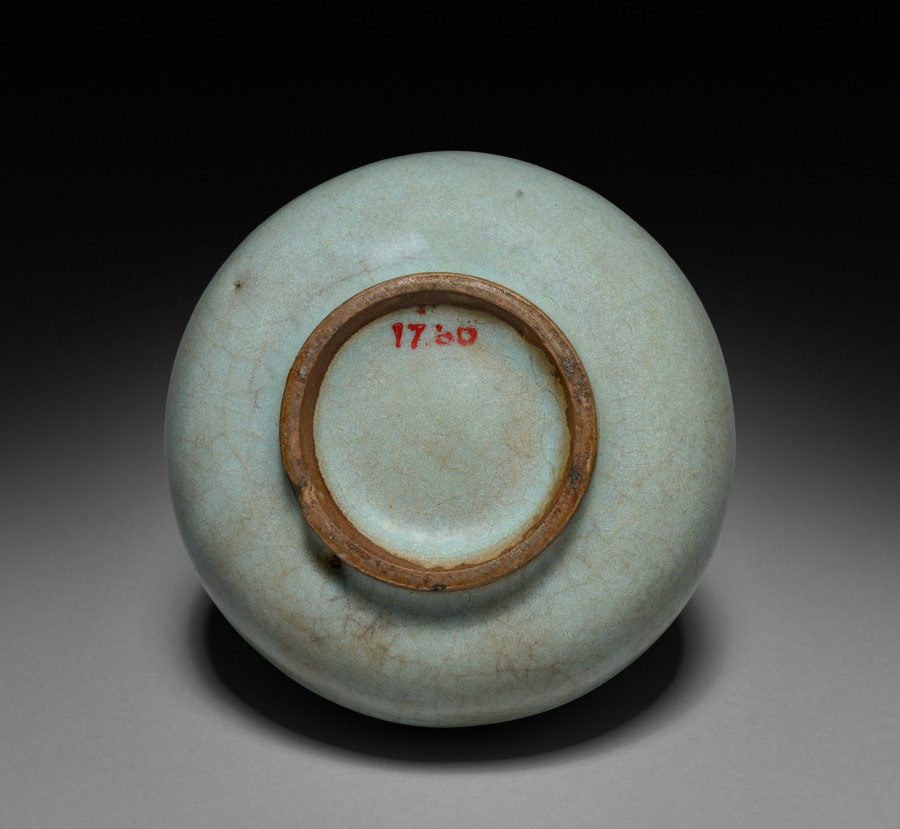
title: Lotus Bud Jar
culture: Northern China, Northern Song dynasty (960-1127) - Jin dynasty (1115-1234)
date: 1100s–1200s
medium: stoneware, Jun ware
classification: Ceramic